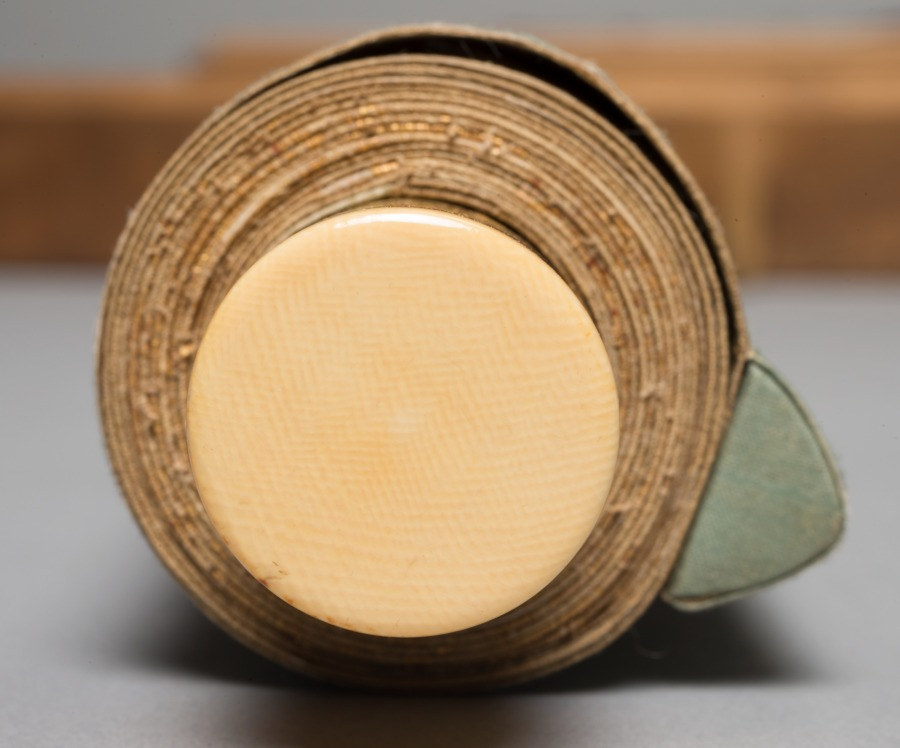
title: Hotei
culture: Japan, Muromachi period (1392–1573)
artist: Kichizan Minchō (Japanese, 1352–1431)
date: late 1300s–early 1400s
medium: hanging scroll; ink and slight color on paper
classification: Painting